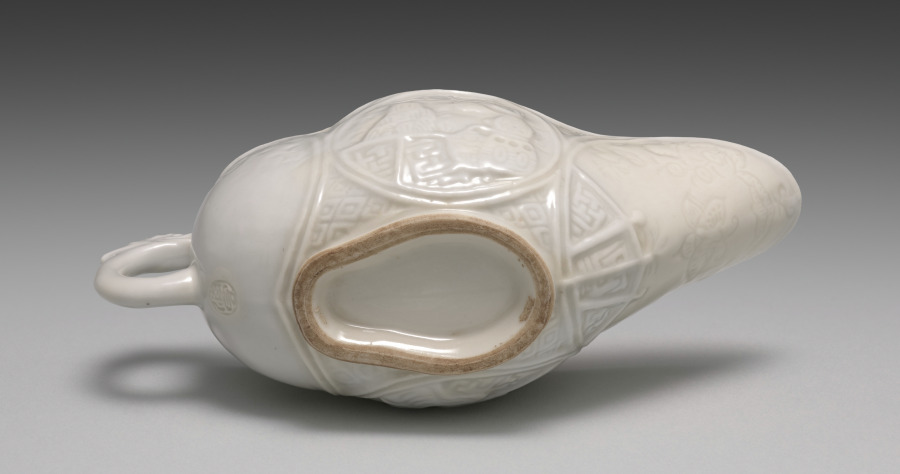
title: Water Cooler with Chinese Gardens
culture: Japan, Meiji period (1868–1912)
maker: Seifū Yohei III (Japanese, 1851–1914)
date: 1893–97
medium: Porcelain with molded and carved designs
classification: Ceramic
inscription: Artist's seal beneath the handle.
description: Unlike most pieces by the Seifu Yohei studio, this one bears a seal beneath the handle rather than on the base. The glaze and technique are identified on the box as taihakuji, or “great white porcelain,” an important early invention Yohei III devised in 1872 that involved the combination of a distinctive translucent, creamy glaze over an ivory-colored clay body. The body’s two sides have garden scenes seen through windows. Designs of flowers and butterflies are incised in the spaces at both ends. The garden on the right-hand side of the vessel, seen through a round window, has a decorative rock with grasses beneath a cloudy sky; and on a tiled veranda, there is a teapot as well as a fan and two scrolls inserted into a double-handled urn or kettle atop a brazier. The garden on the left-hand side has two enormous flowers below what may be either a cloud or a rippling pond; a garden rock—or perhaps a carved wood sculpture—with a circular perforation sits on what appears to be a veranda. While the details may be open to interpretation, the setting is a rather glamorous Chinese residence or palace with a superbly tended garden in spring or summer.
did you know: This water cooler has a handle with a dragon head.